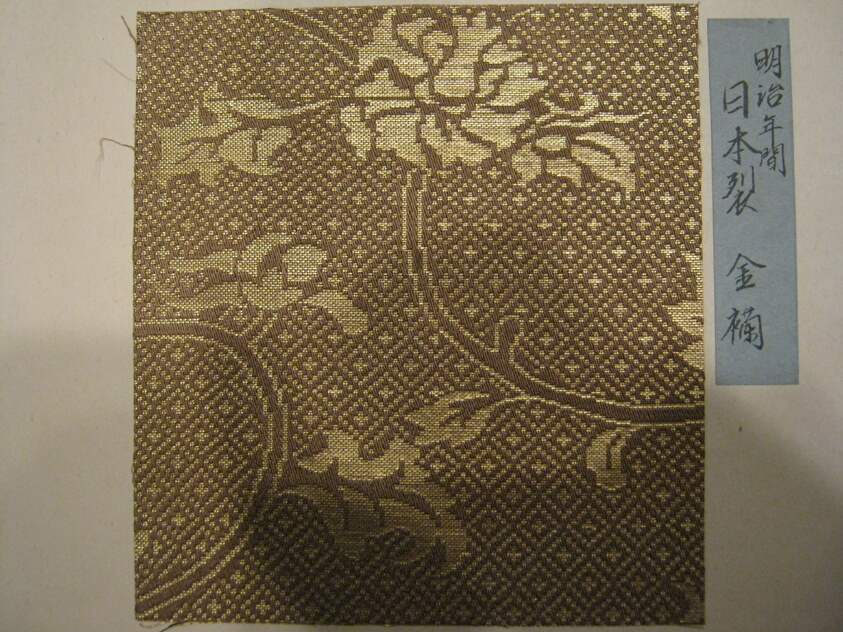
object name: Textile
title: Fragment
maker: Japan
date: 18th century, late Edo period (1789–1868)/ Meiji period (1868–1912)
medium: Plain compound twill, silk & gilt paper; 2 strips to m.m.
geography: Japan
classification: textile; weaving